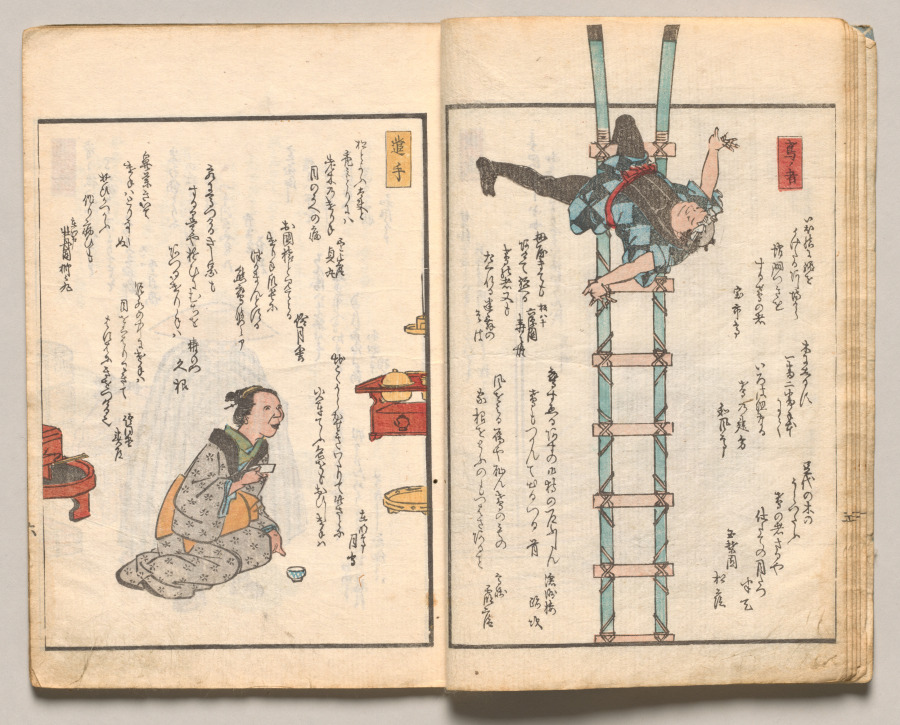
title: Spread Six from Volume Two of People of Japan in Light Verse (Kyōka)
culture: Japan, Edo period (1615–1868)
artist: Utagawa Hiroshige (Japanese, 1797–1858)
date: 1857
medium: Woodblock-printed book; ink and color on paper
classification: Bound Volume